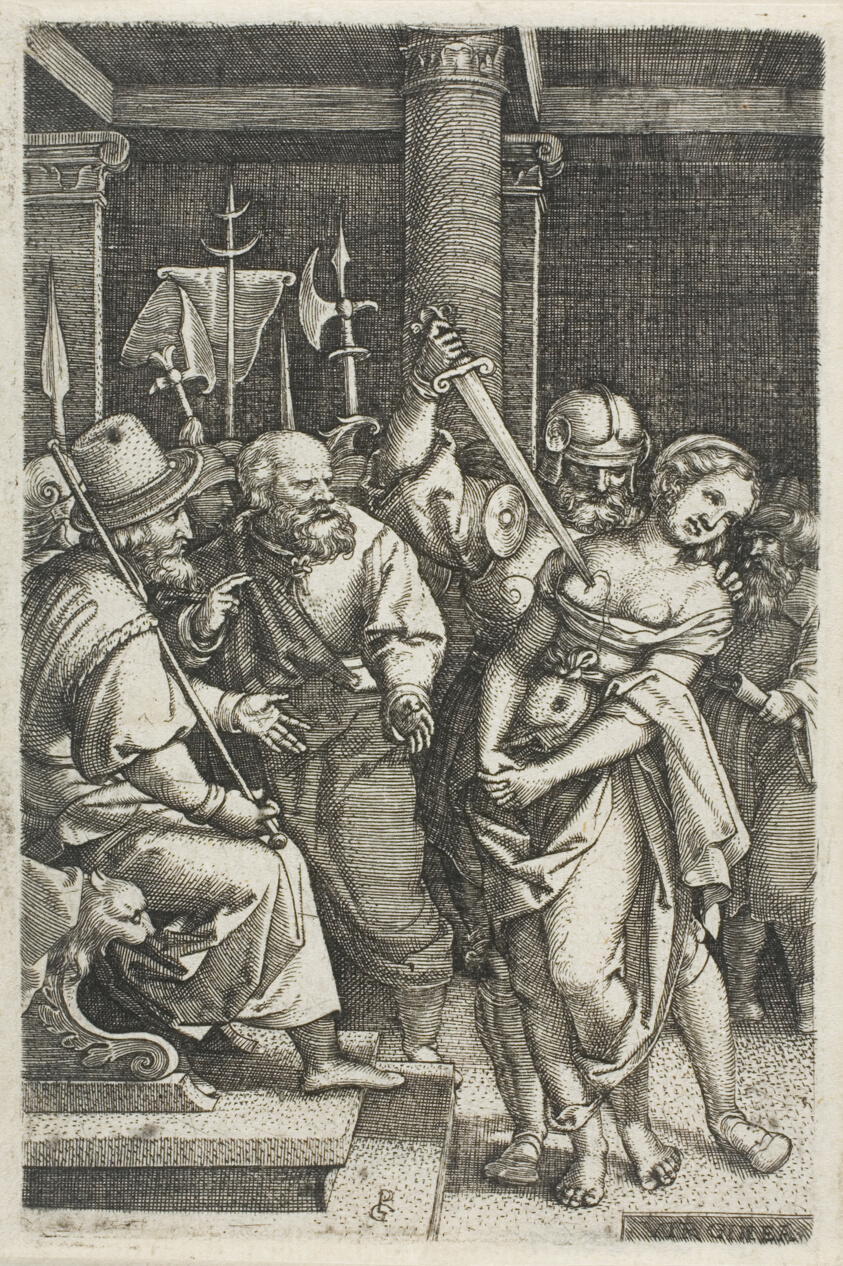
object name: Print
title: Virginius Killing His Daughter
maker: Georg Pencz (German, c. 1500-1550)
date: 1546/47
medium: Engraving in black on ivory laid paper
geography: Germany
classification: engraving; print; prints and drawing